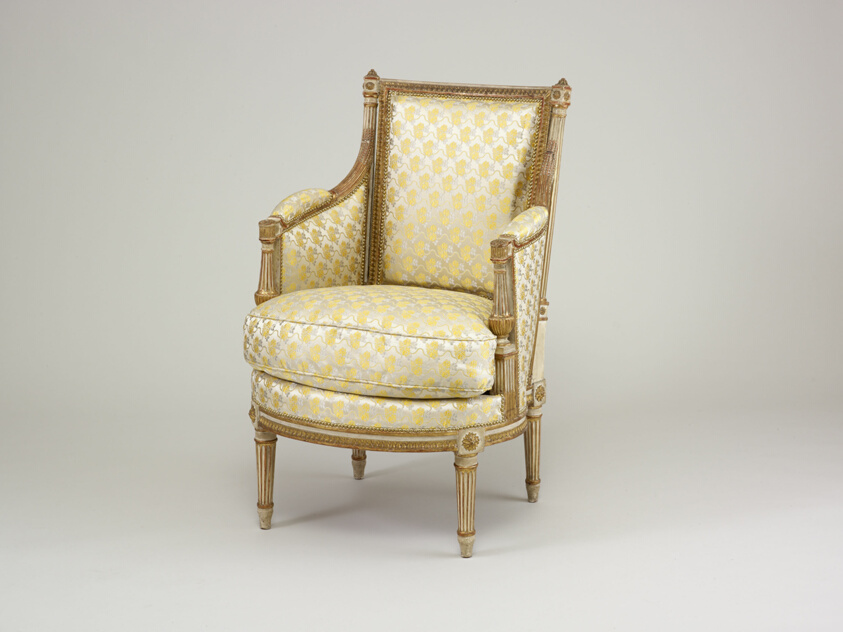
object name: Furniture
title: Armchair (one of a pair)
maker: Designed by Jean Avisse; French, 1723-1796; Paris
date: 1780/85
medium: Beechwood, painted and gilded, modern reproduction upholstery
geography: Paris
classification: seating; furniture; european decorative arts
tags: furniture